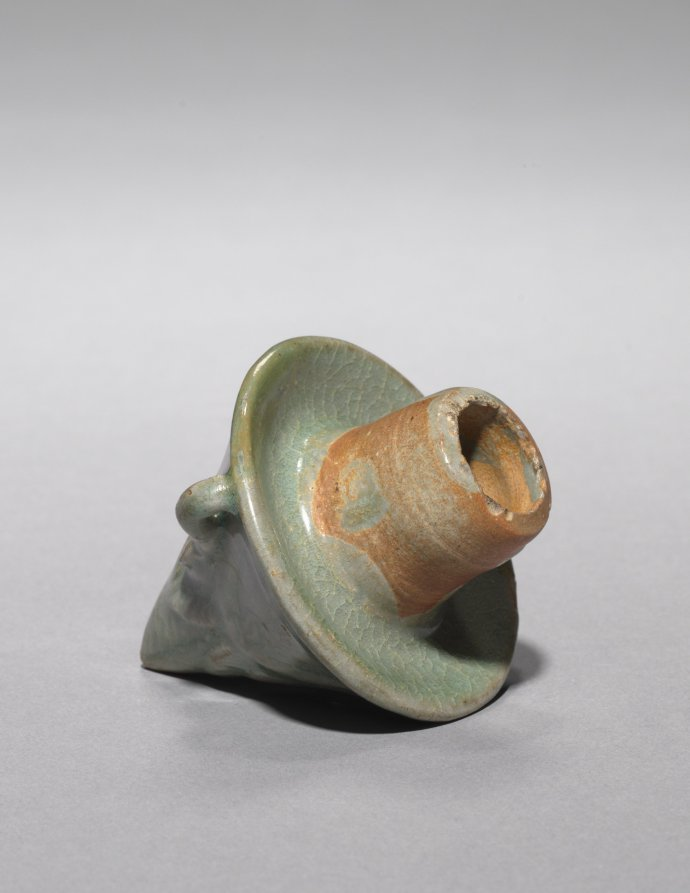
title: Lid for Bamboo Shoot-shaped Ewer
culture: Korea, Goryeo dynasty (918–1392)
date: 1100s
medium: earthenware with carved designs and celadon glaze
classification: Ceramic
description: Natural motifs inspired both the shape of celadon vessels as well as their inlaid designs in the Goryeo period. This wine ewer is shaped like a bamboo shoot, but it also resembles a lotus bud. Even though the spout was repaired, the ewer is a celadon masterpiece of the Goryeo period.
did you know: This lid was donated in 1998 for the bamboo-shaped wine pitcher (CMA 1928.179), but it turned out to be too big.